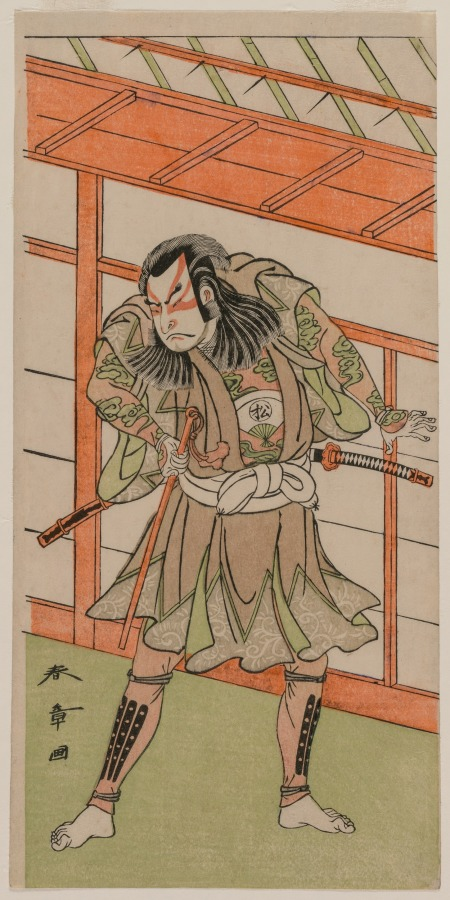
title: The Actor Onoe Matsusuke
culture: Japan, Edo period (1615–1868)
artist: Katsukawa Shunshō (Japanese, 1726–1792)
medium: color woodblock print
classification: Print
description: Shunsho was a well-known painter and printmaker in Edo (present-day Tokyo) who dominated the actor print field. He was very important as a teacher to some of the most talented artists of the next generation, including Shunko, Shunzan, and Shunei.